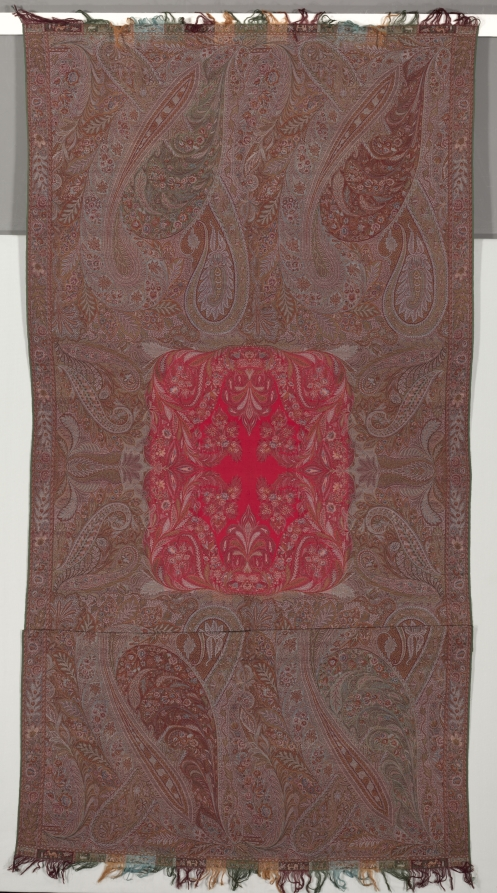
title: Long Shawl in a Vegetal Style with Coral Center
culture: Austria, England, France, or Scotland, 19th century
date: 1848–52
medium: 3/1 twill weave; wool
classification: Textile